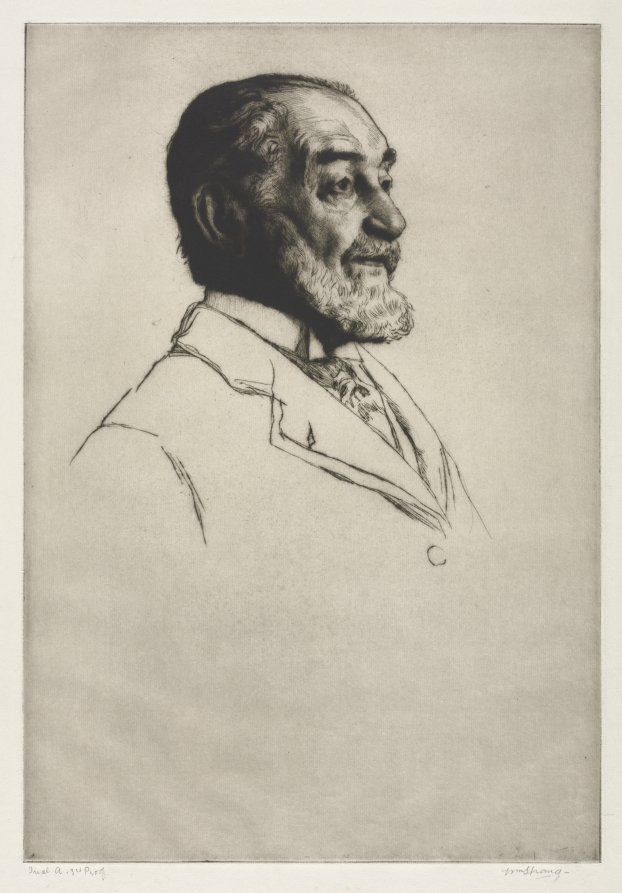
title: Frederick Harrison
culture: England, 20th century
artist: William Strang (British, 1859–1921)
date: 1914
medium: etching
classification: Print